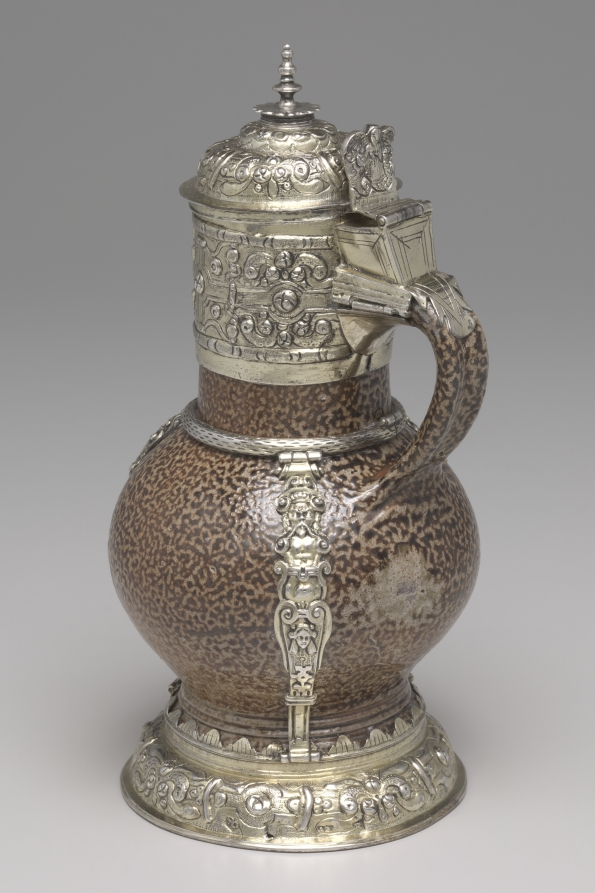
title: Tigerware Jug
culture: Germany and England, 16th century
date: 1594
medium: stoneware with gilt-silver mounts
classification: Metalwork